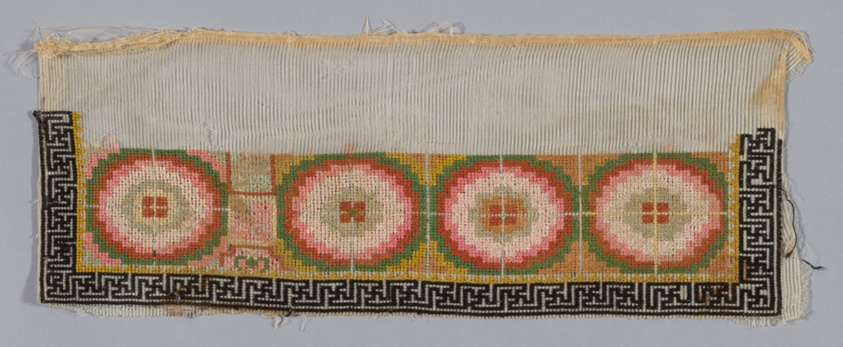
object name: Costume and Accessories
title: Trouser Band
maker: Han-Chinese (China)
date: Qing dynasty (1644–1911), 1875/1900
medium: Forty-four pairs and eight odd pieces of embroidered sleeve, ankle bands, etc. on gauze.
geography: China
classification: costume - embroidery; embroidery; costume